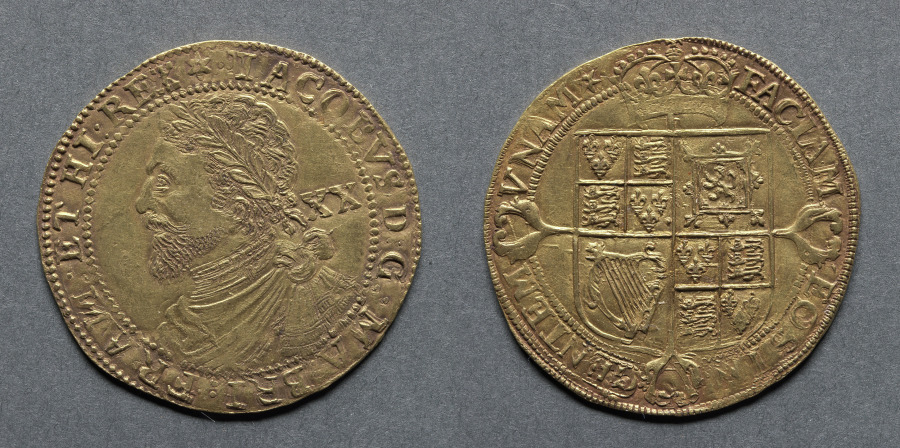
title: Laurel: James I (obverse); Shield of Arms (reverse)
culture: England, James I, 1603-1625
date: 1619–1620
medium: gold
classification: Coins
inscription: IACOBVS D:G: MAG: BRI: FRA:ET HIB: REX, XX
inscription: FACIAM EOS IN. GENTEM. UNAM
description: In 1611 the value of all gold coins, which had previously been down-rated, was now raised by ten percent. Previously the gold coins had circulated at inconvenient fractional values, such as 33 shilling; 16 shillings and 6 pence; 4 shillings and 4 pence three farthings; and so forth. To obviate this a new unit of 20 shillings value was introduced, of which this is a specimen. Showing the king wearing a laurel wreath, it quickly became known as a "Laurel."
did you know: The king is shown dressed as a Roman Emperor wearing armor.